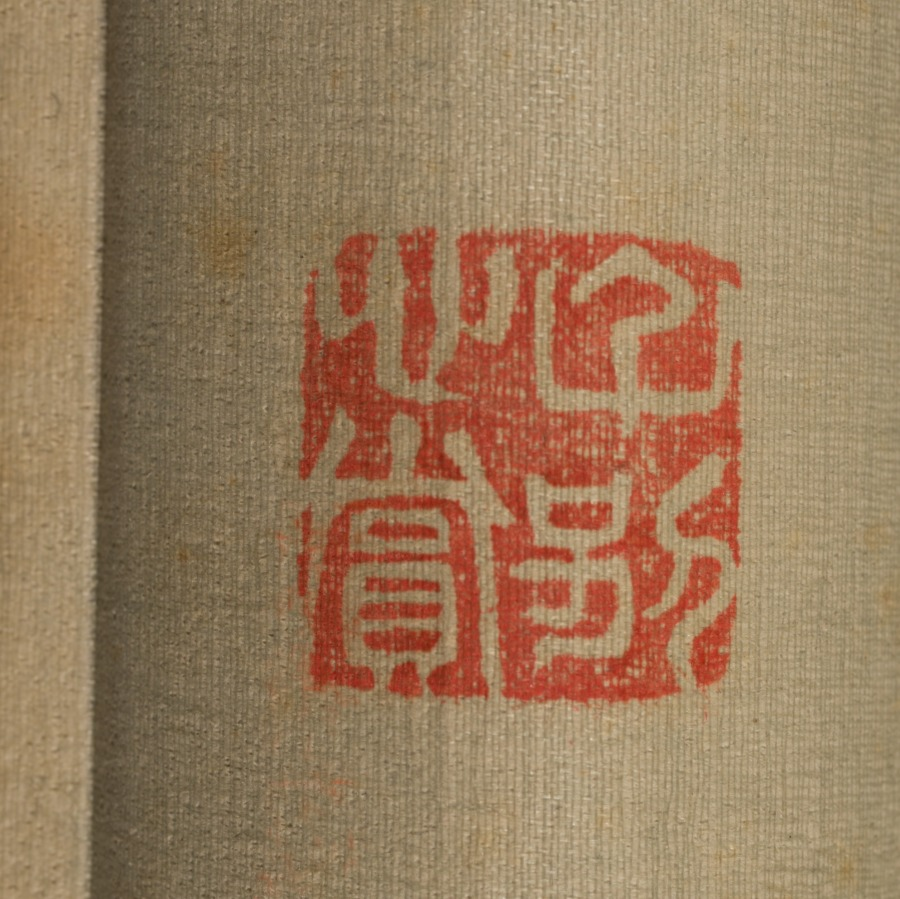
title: Lake Suwa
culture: Japan, Edo period (1615–1868)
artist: Utagawa Hiroshige (Japanese, 1797–1858)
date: c. 1832–58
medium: hanging scroll; ink and color on silk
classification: Painting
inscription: 立斎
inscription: 廣重